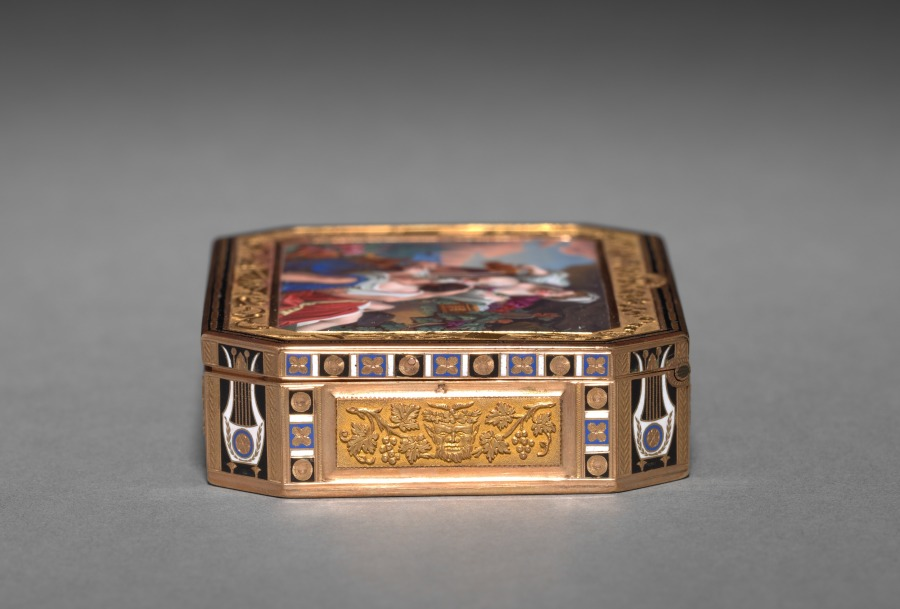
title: Box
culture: Switzerland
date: early 1800s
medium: gold and enamel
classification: Enamel